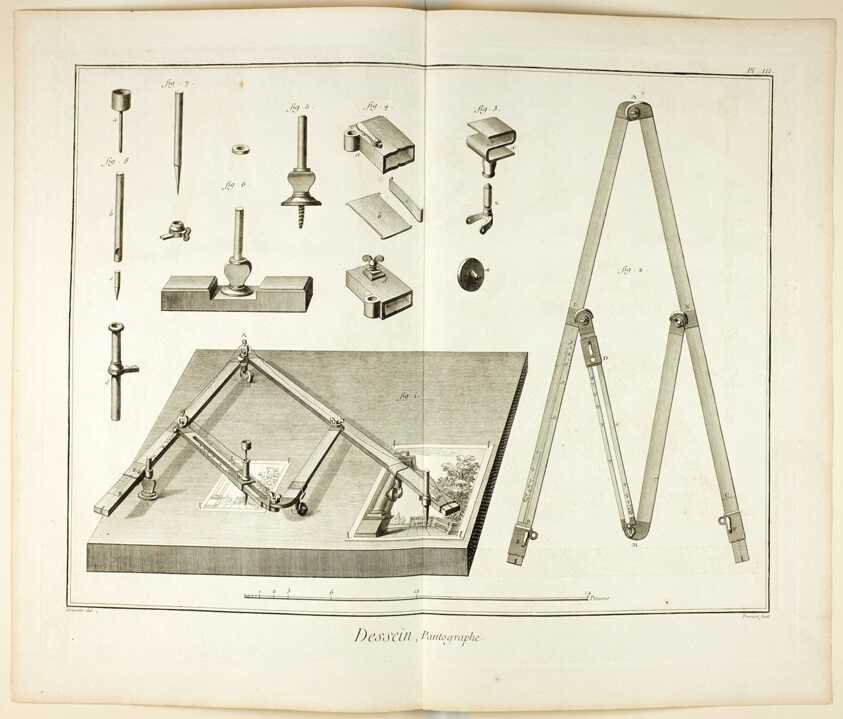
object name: Print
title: Design: Pantograph, from Encyclopédie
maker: Benoît-Louis Prévost (French, c. 1735-1809); after Louis-Jaques Goussier (French, 1722-1799); published by André le Breton (French, 1708-1779), Michel-Antoine David (French, c. 1707-1769), Laurent Durand (French, 1712-1763), and Antoine-Claude Briasson (French, 1700-1775)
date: 1762/77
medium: Engraving on cream laid paper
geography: France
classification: etching; print; prints and drawing